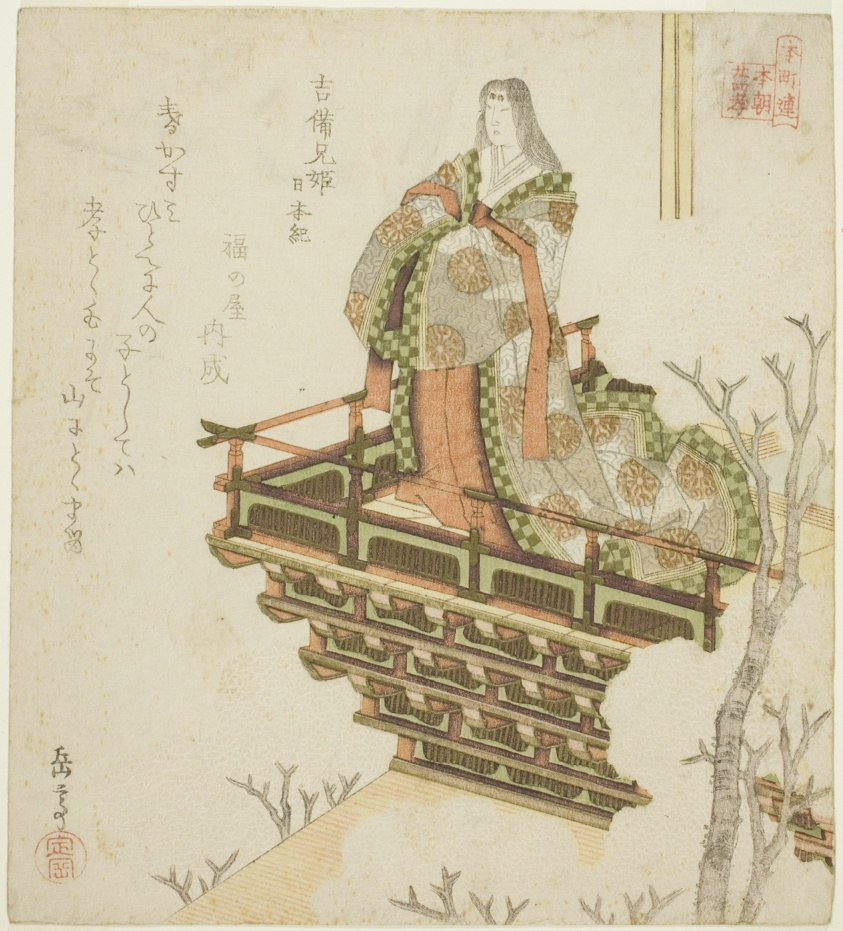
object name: Print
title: Kibi ehime from the Chronicles of Japan (Kibi ehime, Nihongi), from the series "Twenty-four Japanese Paragons of Filial Piety for the Honcho Circle (Honchoren Honcho nijushiko)"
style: Japanese (culture or style)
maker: Yashima Gakutei (Japanese, 1786 (?)-1868)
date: c. 1821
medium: Color woodblock print; shikishiban, surimono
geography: Japan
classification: woodblock print; print; asian art